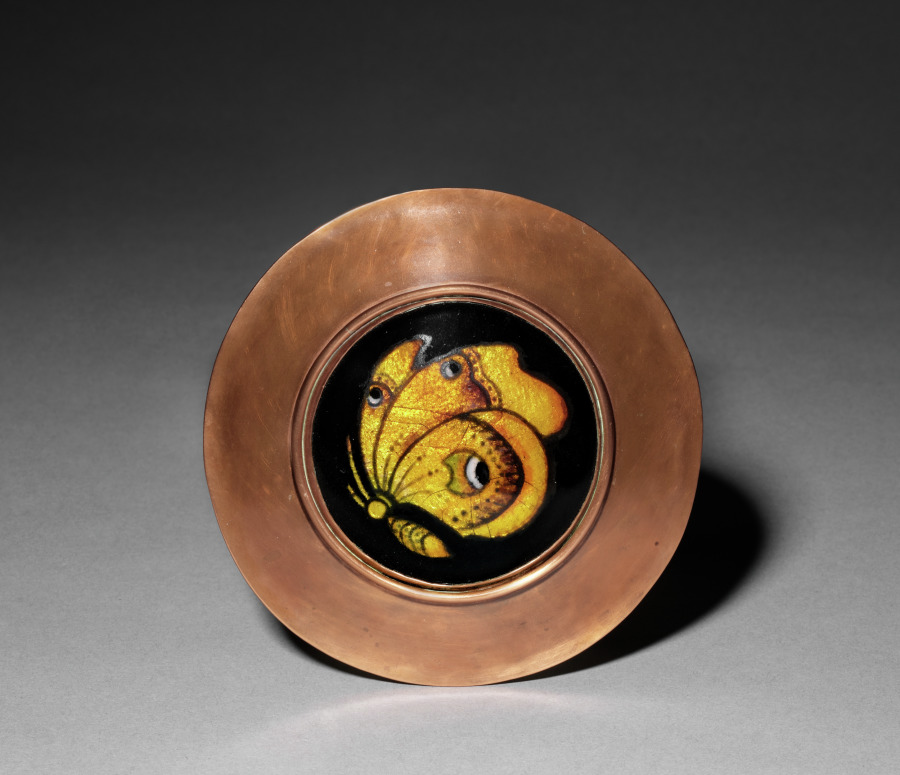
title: Cover for a Bowl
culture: America, Ohio, Cleveland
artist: Kenneth F. Bates (American, Cleveland, 1904–1994)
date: 1927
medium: copper and enamel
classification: Enamel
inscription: incised on bottom: "Kenneth F. Bates 1927."